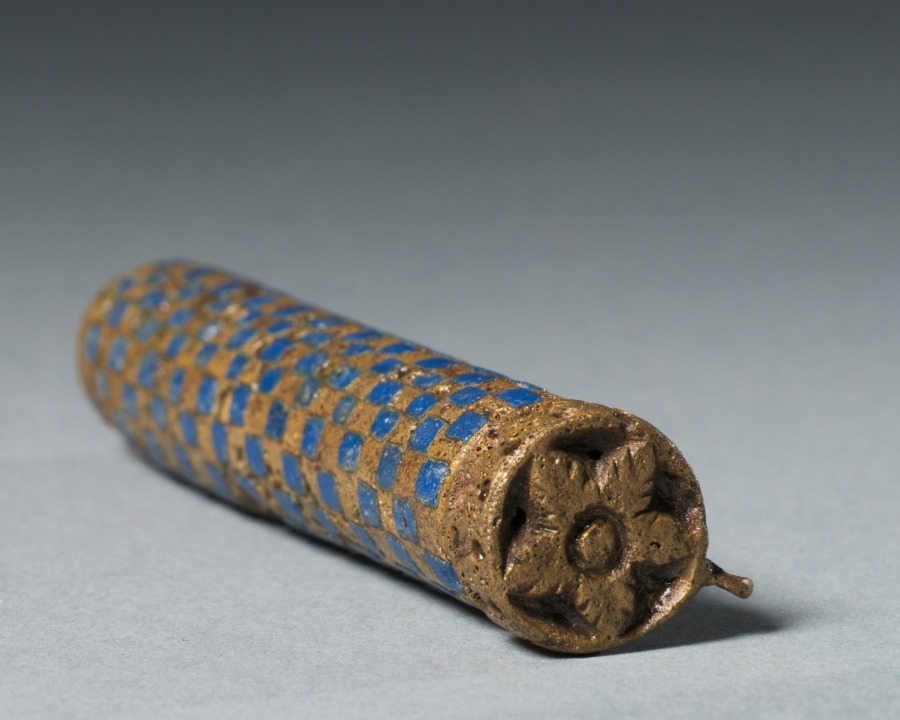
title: Kohl Tube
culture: Egypt, Greco-Roman period (332 BCE–395 CE), Ptolemaic dynasty (305–30 BCE)–Roman empire (30 BCE–395 CE)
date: 305 BCE–395 CE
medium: brass with blue enamel decoration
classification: Cosmetic Objects